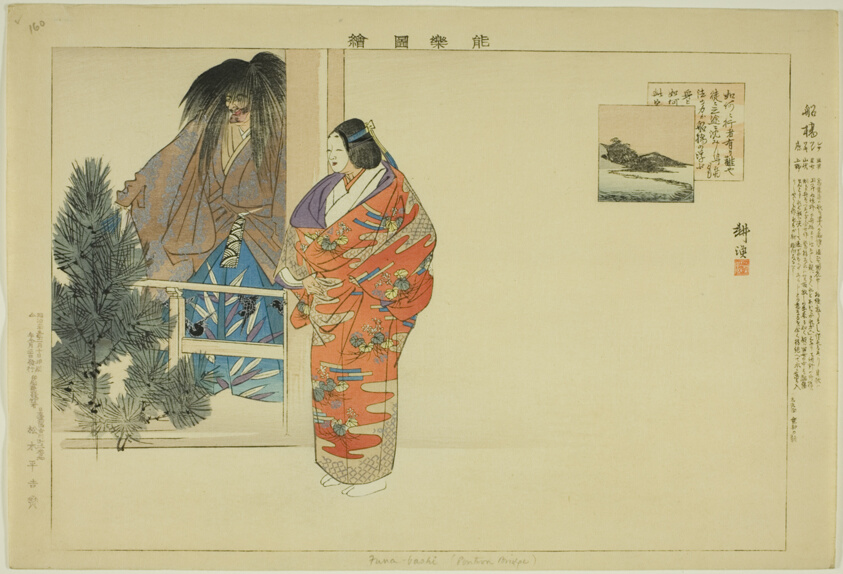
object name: Print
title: Funabashi, from the series "Pictures of No Performances (Nogaku Zue)"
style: Japanese (culture or style)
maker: Tsukioka Kogyo; Japanese, 1869-1927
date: 1898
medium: Color woodblock print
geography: Japan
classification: woodblock print; print; asian art